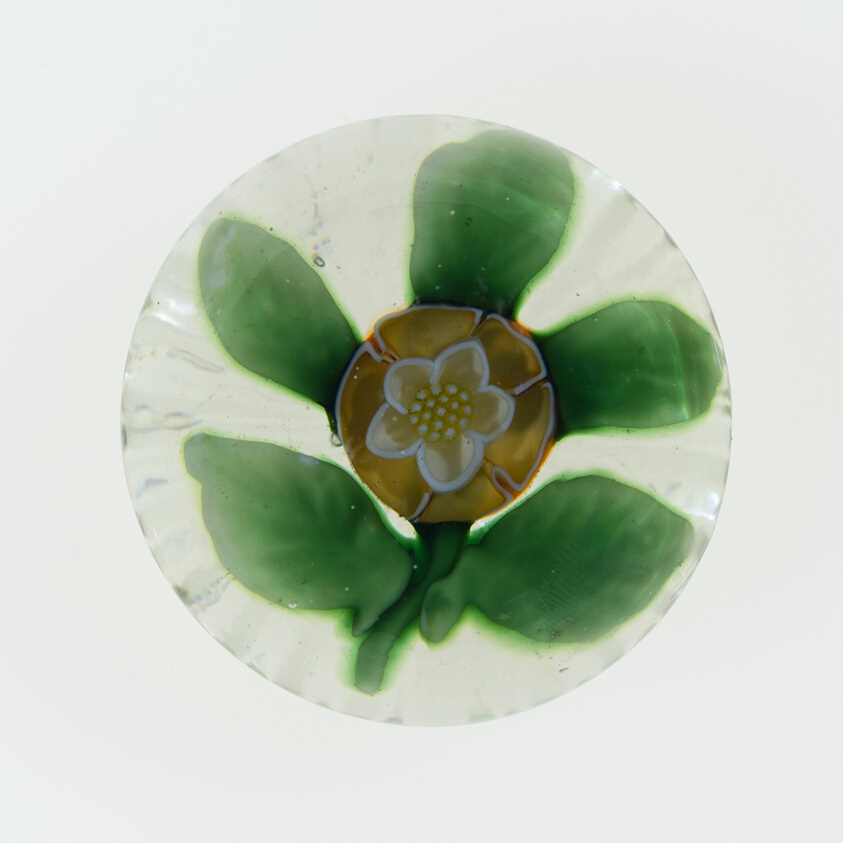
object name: Glass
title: Paperweight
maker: Baccarat Glassworks (Cristalleries de Baccarat); Lorraine, France, founded 1764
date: c. 1845–60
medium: Glass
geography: Baccarat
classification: paperweight; glass